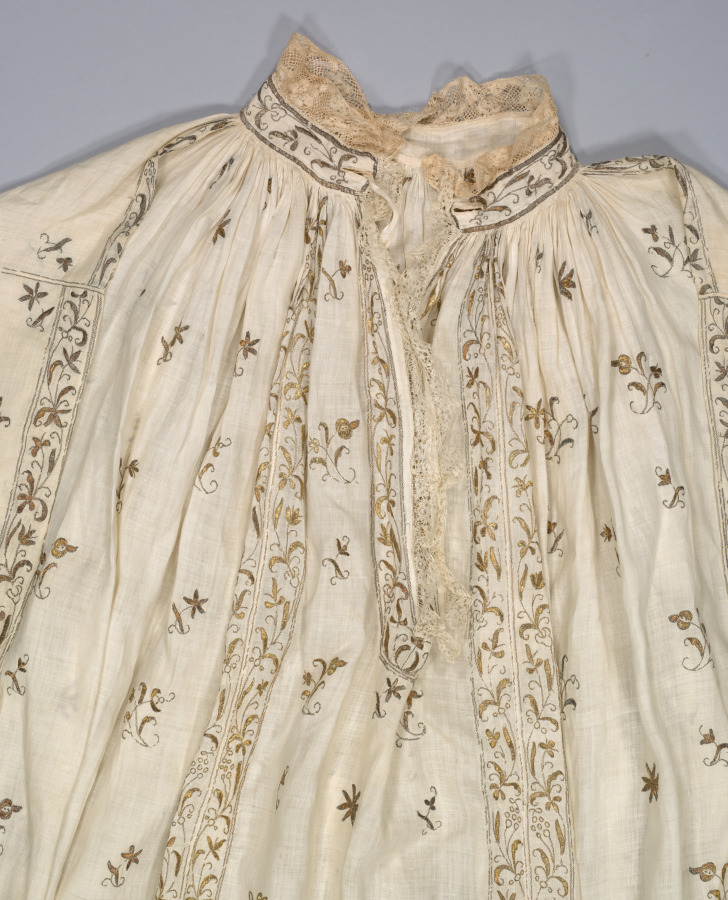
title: Alb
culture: Spain: embroidered linen; Flanders: bobbin lace (Point d’Angleterre) flounce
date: Embroidered Linen: 1600s; Bobbin Lace (Point d’Angleterre) Flounce: 1700s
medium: Plain weave linen embroidered in gold and silver; linen bobbin lace (Point d’Angleterre a Reseau)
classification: Garment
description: This beautiful vestment, called an alb, was worn under other liturgical garments by the clergy who served at the altar. Embroidered with gilt-metal thread flora on a linen ground, it is trimmed with a flounce and cuffs of lace, the most fashionable and expensive material at the time. Its purple silk lining indicates that it belonged to an archbishop. The exquisitely worked bobbin lace consists of two large composite floral designs flanked by popular curved forms on an elaborate bar ground that repeats ten times around the flounce.